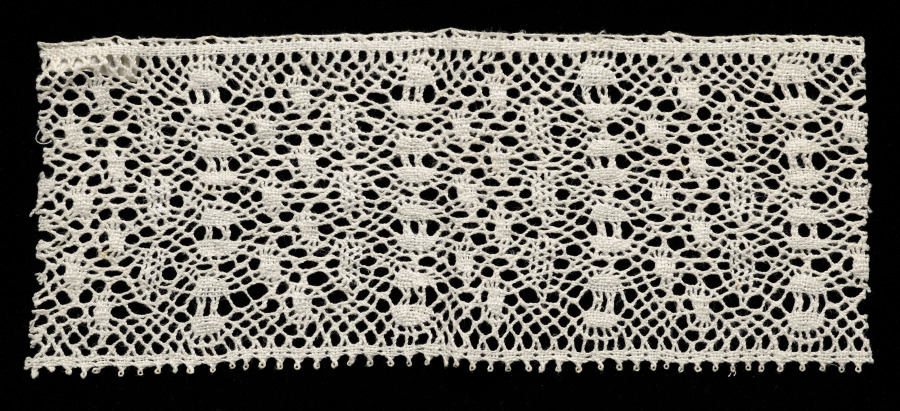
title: Lace Insertion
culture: Italy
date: 1600s–1700s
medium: Bobbin lace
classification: Lace